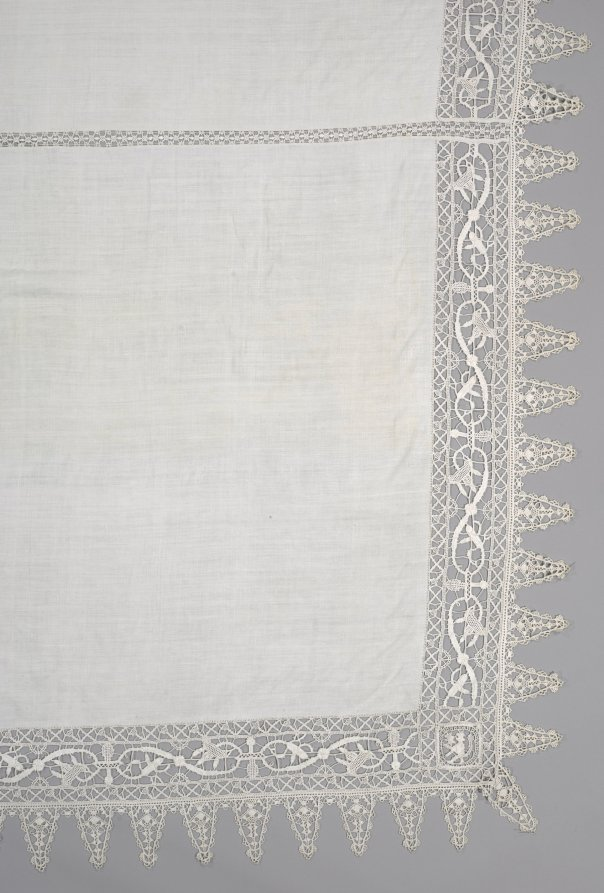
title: Lace Cloth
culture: Italy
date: 1560–99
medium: Linen: needle lace (reticella) insertion and bobbin lace insertion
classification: Lace